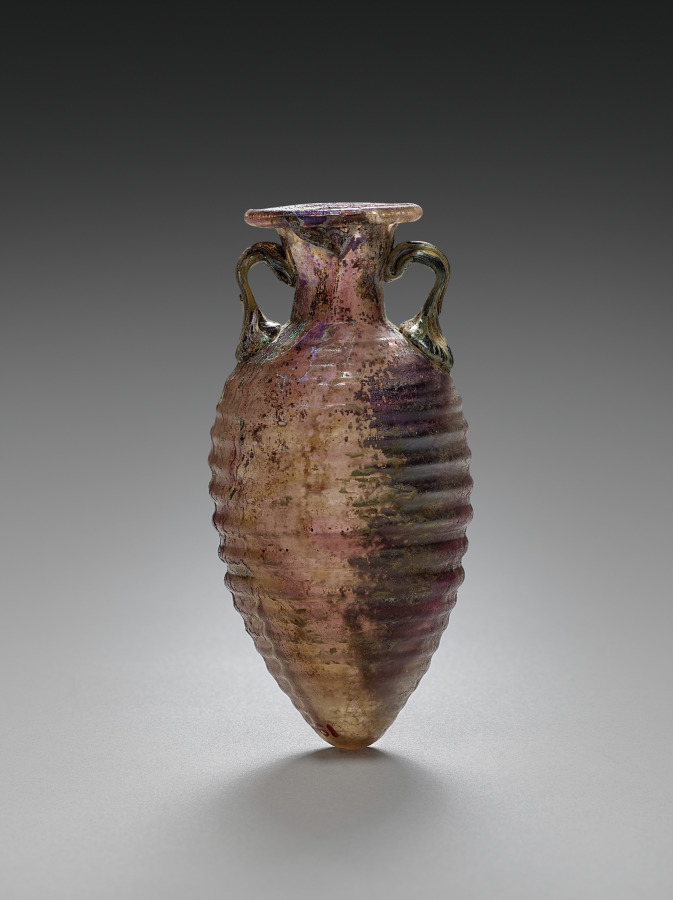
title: Amphoriskos (Small Amphora)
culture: Roman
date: 50–100 CE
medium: glass, mold-blown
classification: Glass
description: First blown in a mold, then supplied with separately made handles, this small vessel likely held perfumed oil, a valuable commodity. Originally violet in color, its surface is now partially marred by areas of buff and iridescent weathering. The finely ribbed body is quite elegant, however, and its extravagant modern box attests to its significant value for a modern owner (prior to 1919).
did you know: Although much smaller, glass amphoriskoi (“small amphorae”) are similar in form to ceramic transport amphorae.